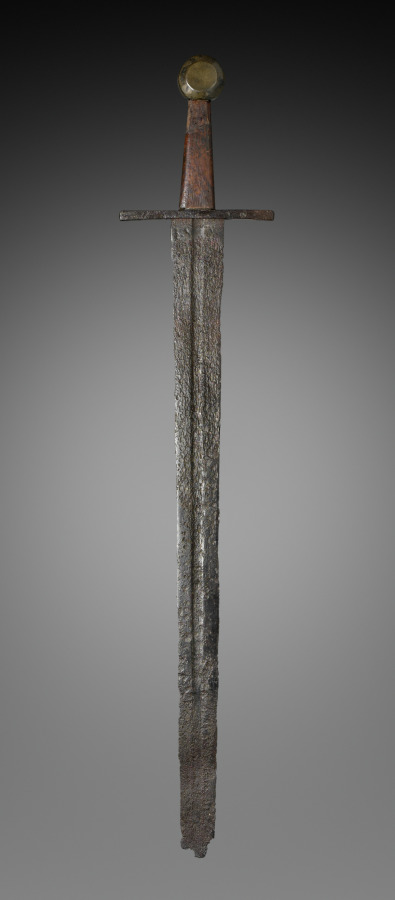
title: Sword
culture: Germany(?)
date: c. 1350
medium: iron; wood grip and brass pommel replacements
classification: Arms and Armor